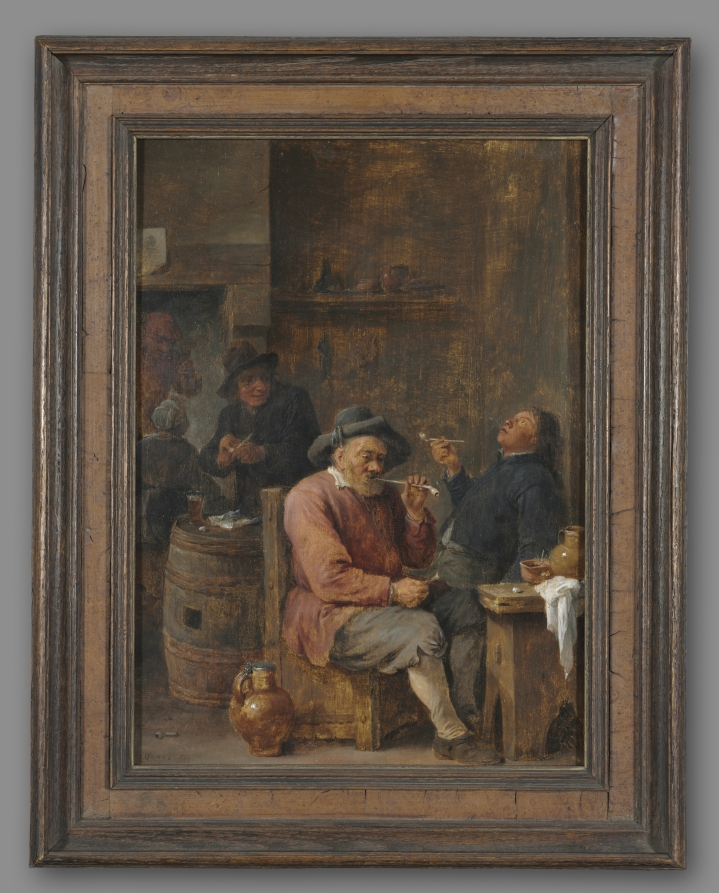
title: Peasants Smoking in an Inn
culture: Flanders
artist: David Teniers (Flemish, 1610–1690)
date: c. 1640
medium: oil on wood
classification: Painting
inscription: signed lower left: D. TENIERS. FEC.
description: David Teniers the Younger was a popular artist who specialized in small paintings of rustic Flemish life in the 1600s. In works such as Peasants Smoking in an Inn, an older man and a younger man in the foreground smoke tobacco. The younger man rests limply against the wall and his head lolls back, a gesture that symbolized that he had overindulged in smoke. Another standing man prepares his pipe and watches the younger man with amusement. Tobacco was a novelty in the 1600s, introduced from the Americas and East Indies with other new imports such as sugar cane and rice, and was believed to be a medicinal product. It was particularly recommended for people who lived in "waterish places" such as Antwerp, the capital of Flanders, where Teniers painted this scene. Although many medical practitioners believed tobacco to be a cure for numerous ailments, moral opponents to smoking criticized it as a danger to health and morals. The mixed reputation and widespread popularity of tobacco smoking thus made it a marketable and amusing subject for Flemish artists such as Teniers.